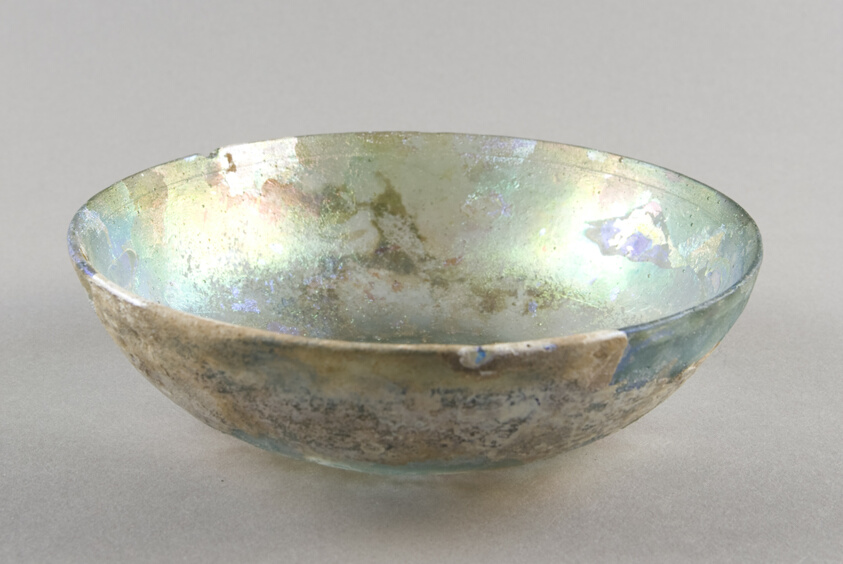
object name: Vessel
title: Bowl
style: syrian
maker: Roman, Levant or Syria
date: 1st-2nd century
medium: Glass, blown technique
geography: Syria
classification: bowl; glass; vessel; ancient art